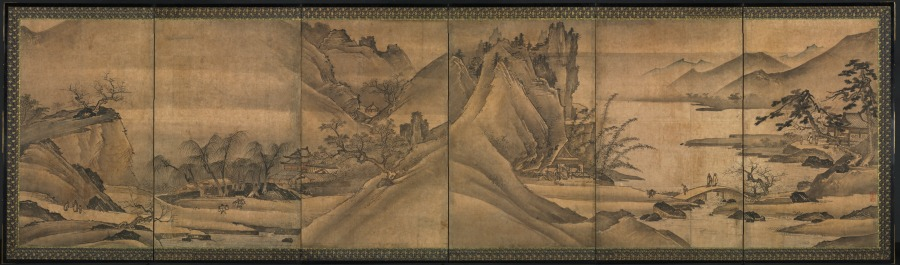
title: Landscape of the Four Seasons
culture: Korea, Joseon dynasty (1392–1910)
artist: Yi Sumun (Korean, b. c. 1404)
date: late 1400s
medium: Pair of six-panel screens; ink and slight color on paper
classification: Painting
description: Yi Sumun is believed to have been a Korean painter who migrated to Japan in 1424 at the age of 20. This pair of screens is the artist’s most important composition in this format. Viewed from right to left, the screens show the passage of the four seasons, a popular theme in medieval Japanese ink painting.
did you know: Yi Sumun is believed to have been a Korean man who moved to Japan in 1424 and became an influential landscape painter in Japan.